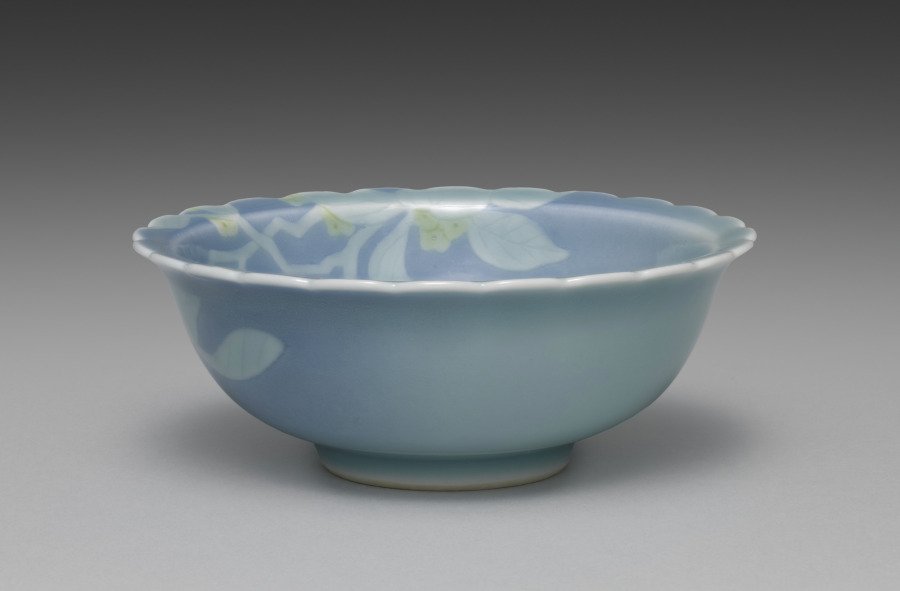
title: Dish from Dishes with Flowers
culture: Japan, Taishō period (1912–26) or Shōwa period (1926–89)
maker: Seifū Yohei IV (Japanese, 1872–1951)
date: 1914–46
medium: One from a set of five dishes; porcelain with underglaze yellow and blue glaze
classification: Ceramic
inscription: 清風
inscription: 清風造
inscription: 成山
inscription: 清風盧人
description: One can imagine a cool summer breeze when looking at this set of dishes, each shaped with a crenulated mouth and glazed with blue. Around the rim and into the basin, the bowls have low-relief designs of flowers with underglaze yellow petals; their leaves and stems show white through the glaze. On each dish, the design continues over the rim onto one side.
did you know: Seifū Yohei IV’s dishes with flowers feature underglaze yellow.